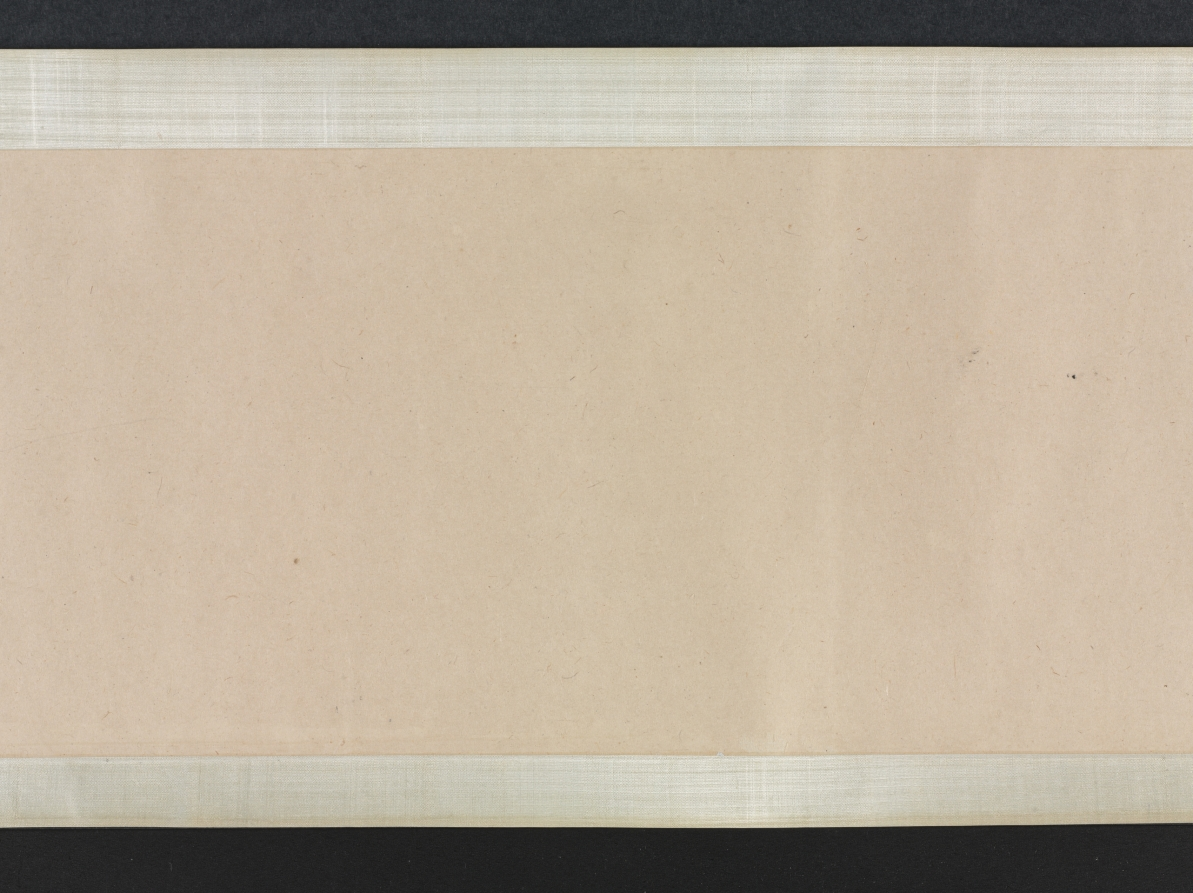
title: Saying Farewell at Xunyang (Song of the Pipa)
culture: China, Ming dynasty (1368–1644)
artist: Wen Boren (Chinese, 1502–1575)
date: 1500s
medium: handscroll, ink and color on paper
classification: Painting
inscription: "潯陽送客圖" 五峰山人文伯仁寫于停雲館中 [印] 文伯仁; 五峰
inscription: 2 colophons and 9 additional seals: 1 transcription of "Pipa xing 琵琶行” (Song of Pipa) and 3 seals of Zhu Yizun 朱彜尊 (1629-1709); 2 seals of Wu Rongguang 吳榮光 (1773-1843); 1 colophon, dated 1826, and 3 seals of Wu Xijia 吳錫嘉 (mid-1700s)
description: This handscroll depicts The Song of the Pipa, a poem by Bai Juyi 白居易 (772–846) written after the poet’s encounter with a pipa player on the Yangzi River. Expelled from her home city when her beauty and fame had faded, she played for the poet at night. Her musical performance and tragic life story resonated with Bai Juyi, who had just been demoted and exiled from life at court himself. The hazy, vast view and pale color tonalities of this painting illustrate these feelings of endless sadness, having lost one’s sense of purpose in life.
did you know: Wen Boren depicted the chilly autumn water with a fishnet pattern.